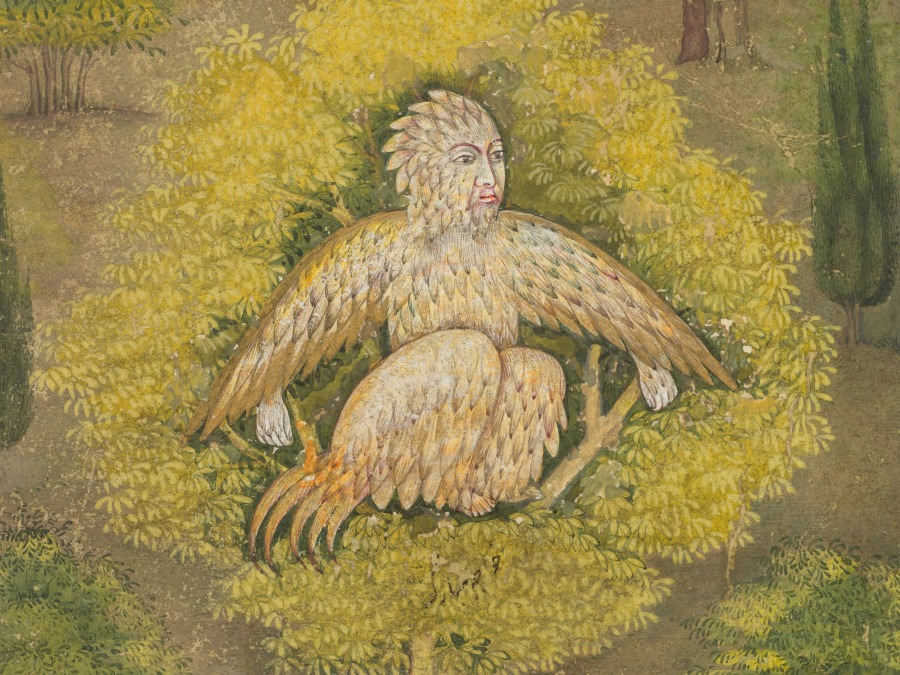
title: Mahliqa, Daughter of the Emperor of China, Pointing at the Bird-Man Khwaja Mubarak: A Leaf from a Poetical Romance Relating to Shah Alam I (recto)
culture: Mughal India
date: c. 1710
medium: Gum tempera and gold on paper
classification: Painting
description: A Persian inscription identifies the bird-man in the tree by name, but the text in which he appears remains unidentified. Also unknown is the Chinese princess Mahliqa (“she who has a face like the moon”), named in a Persian inscription written in front of her face. The artist depicts her in the dress of a Mughal court lady, except for the addition of an unusual headdress, and her handmaidens all look Indian. They gesture to the bird-man from the opposite side of a formal garden canal with fountains. A fortified city lies in the distance behind the walled garden, while creatures peer up at the fabulous composite figure from the water below.